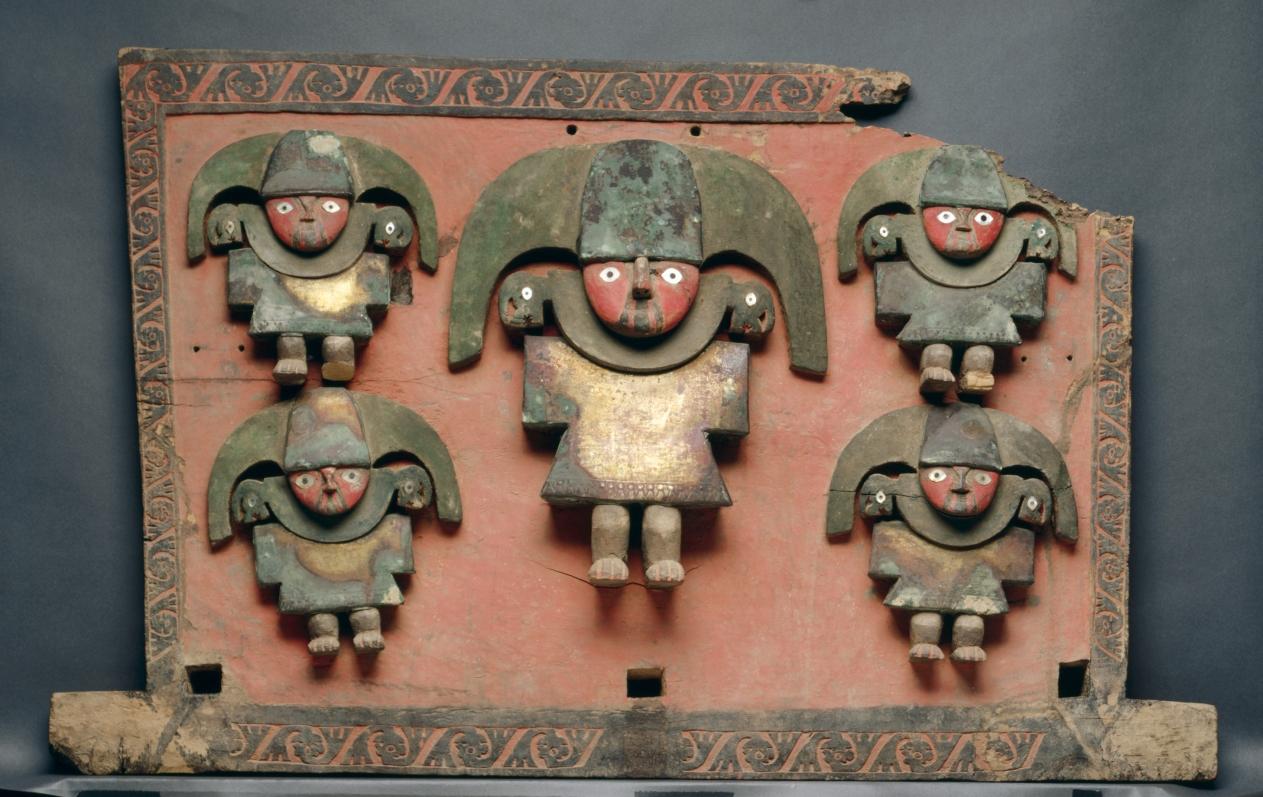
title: Backrest of a Litter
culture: Central Andes, North Coast, Chimú people, late Intermediate period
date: 1185–1275 (radiocarbon date, 95.4% probability)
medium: mixed media: wood, gold alloy, pigment, shell inlay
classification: Sculpture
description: This rare, dramatic object served as the back support of a litter carried by human porters, a mode of transport reserved for honored members of many societies without draft animals or wheeled vehicles. The simple, bold figures—perhaps a Chimú lord and four officials—all wear wide collars, tunics, and crescent headdresses that are either brightly painted or covered with golden but now-corroded sheet metal. The holes at the bottom probably served as lashing points for a beam that supported the litter's seat.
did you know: Cinnabar, a toxic mercuric sulfide, was used to color the red background and faces of the figures.